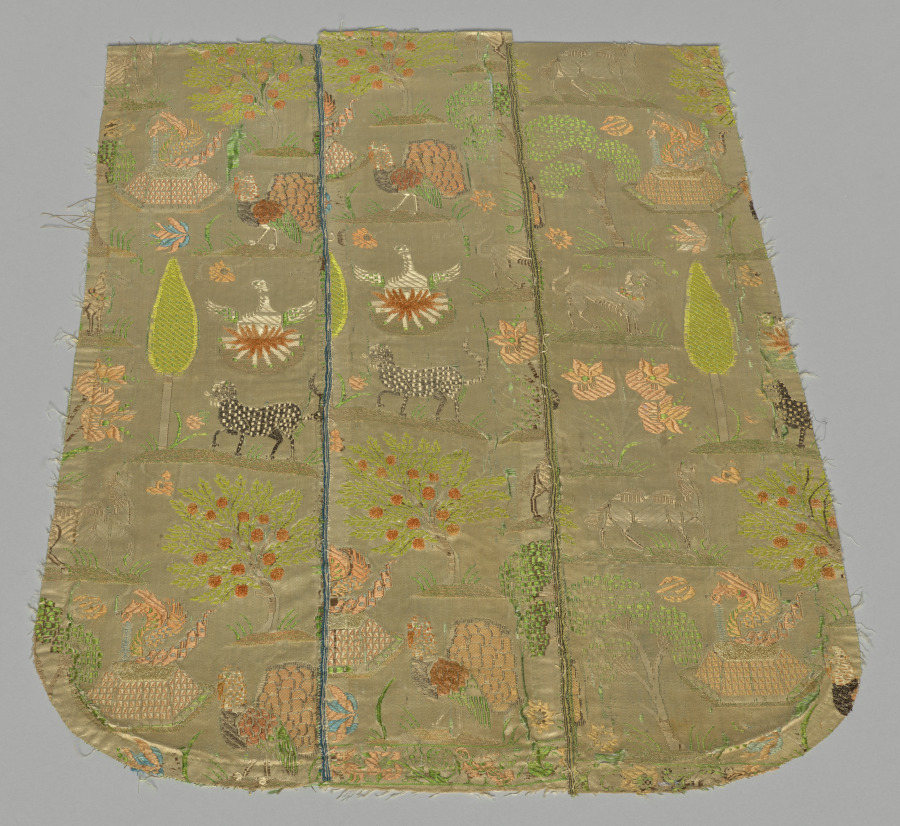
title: Half Chasuble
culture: Spain, Valencia, 18th century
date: 18th century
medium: plain compound cloth, brocaded; silk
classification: Textile